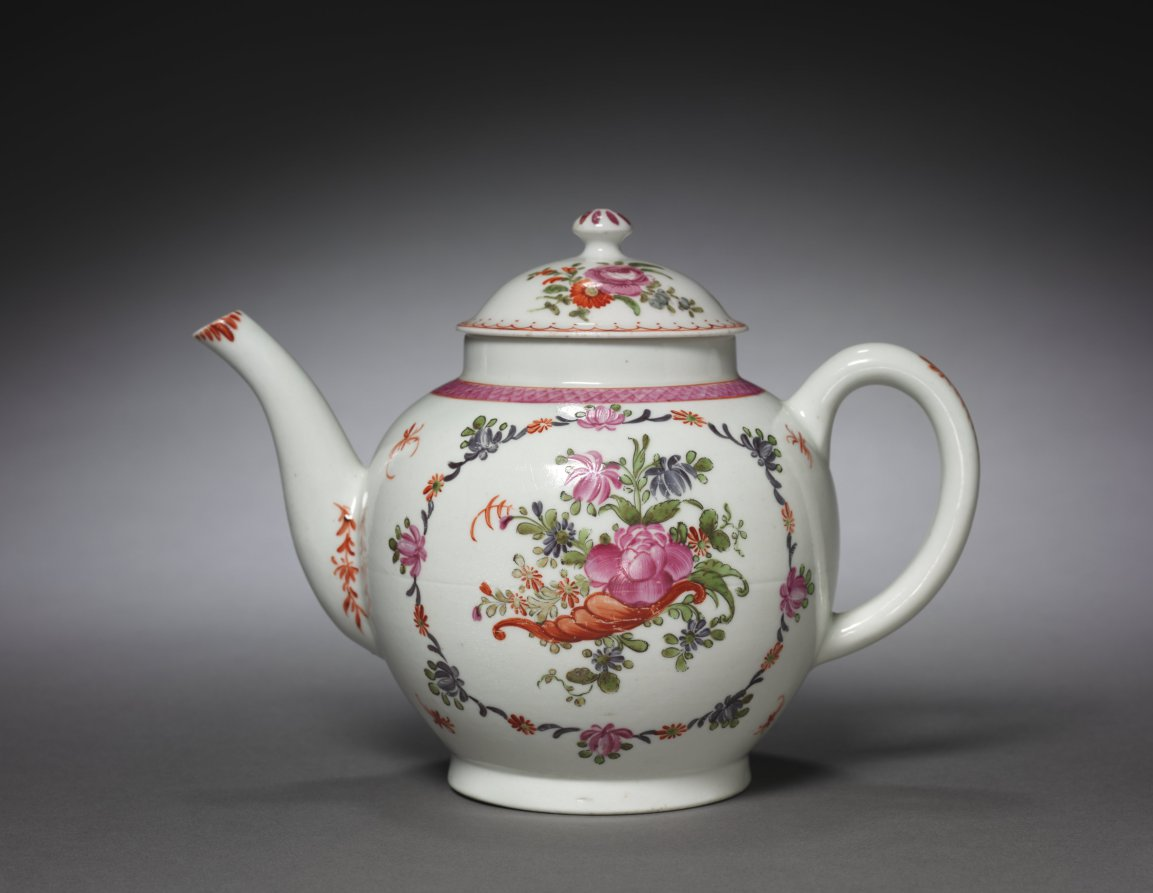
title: Teapot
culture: Staffordshire, England, late 18th century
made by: New Hall Porcelain Factory (British)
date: c. 1782–1790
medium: porcelain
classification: Ceramic